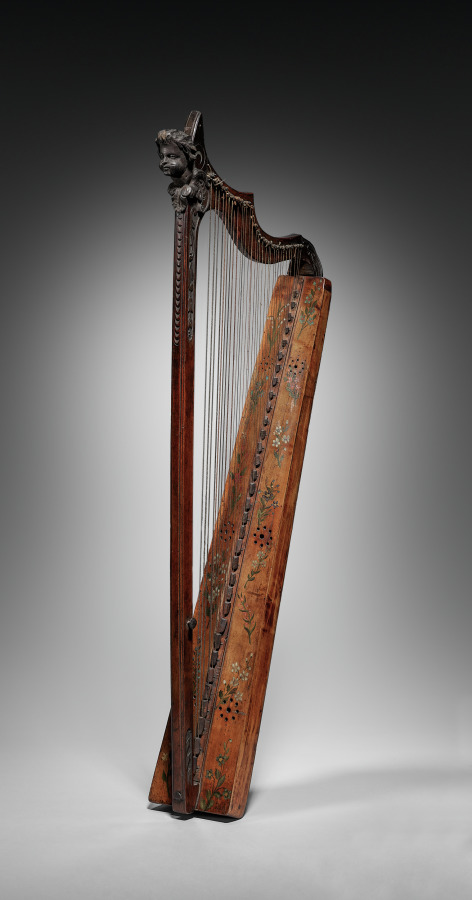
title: Harp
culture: France, 16th century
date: 1500s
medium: wood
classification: Musical Instrument